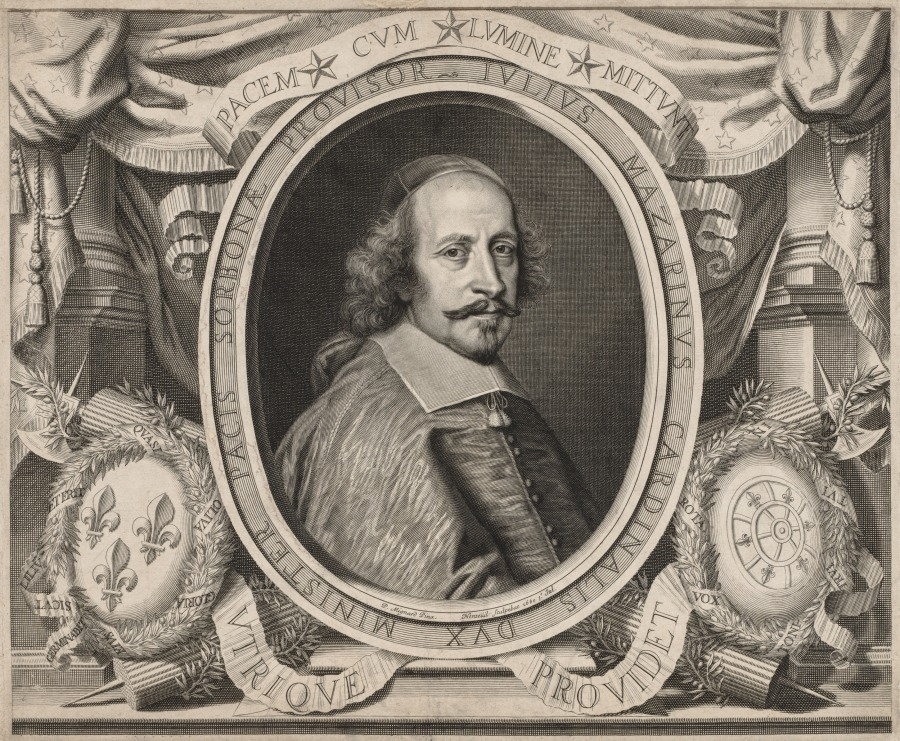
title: Cardinal Mazarin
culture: France, 17th century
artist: Robert Nanteuil (French, 1623–1678)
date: 1660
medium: engraving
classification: Print